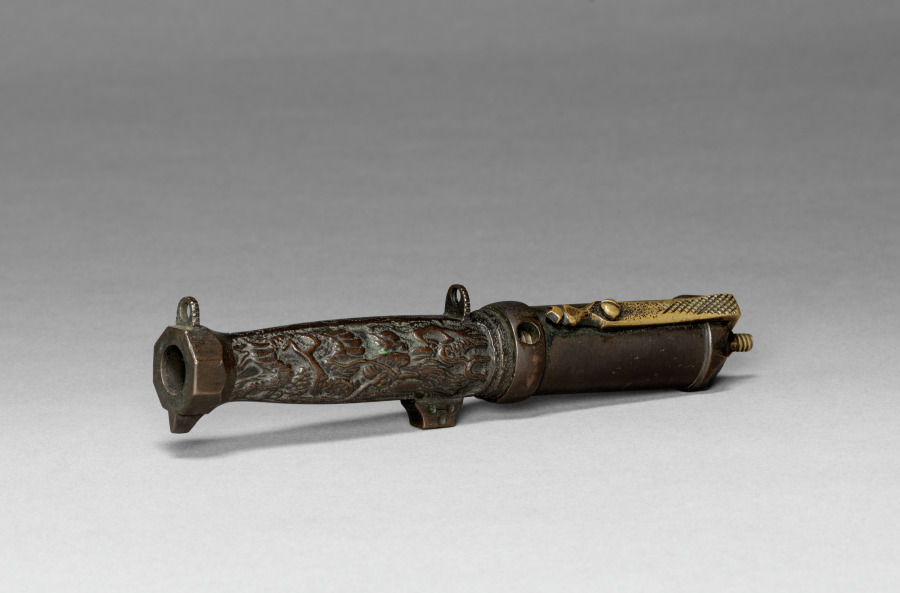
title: Hand Cannon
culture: Japan, Edo period (1615–1868)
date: 1615–1868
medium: bronze and brass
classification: Arms and Armor